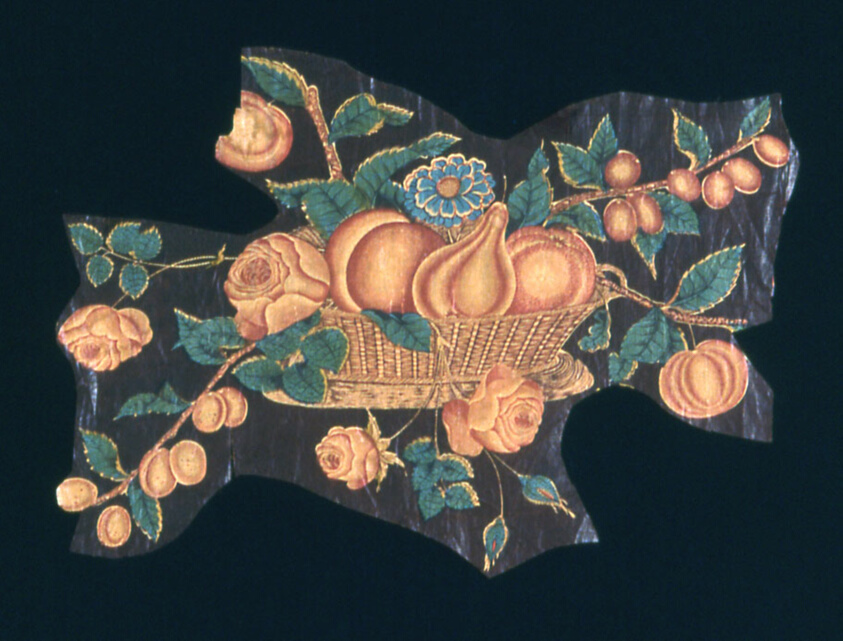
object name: Textile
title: Fragment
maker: England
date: c. 1840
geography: England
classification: textile; weaving - printed